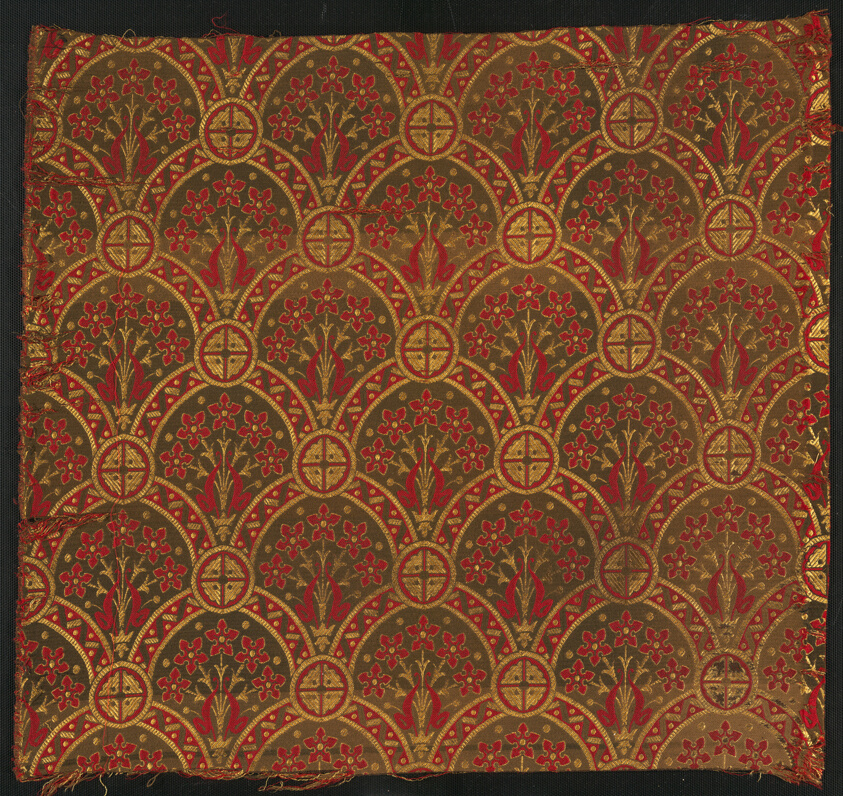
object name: Textile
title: Panel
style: Arts and Crafts Movement, british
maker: Designed by Christopher Dresser (English, born Scotland, 1834–1904); Produced by James W. & C. Ward; England, Halifax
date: 1871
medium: Wool and silk, two color complementary weft, weft-float faced 1:11 satin weave with supplementary patterning wefts bound in 1:11 warp chevron twill interlacings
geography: England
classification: weaving; textile